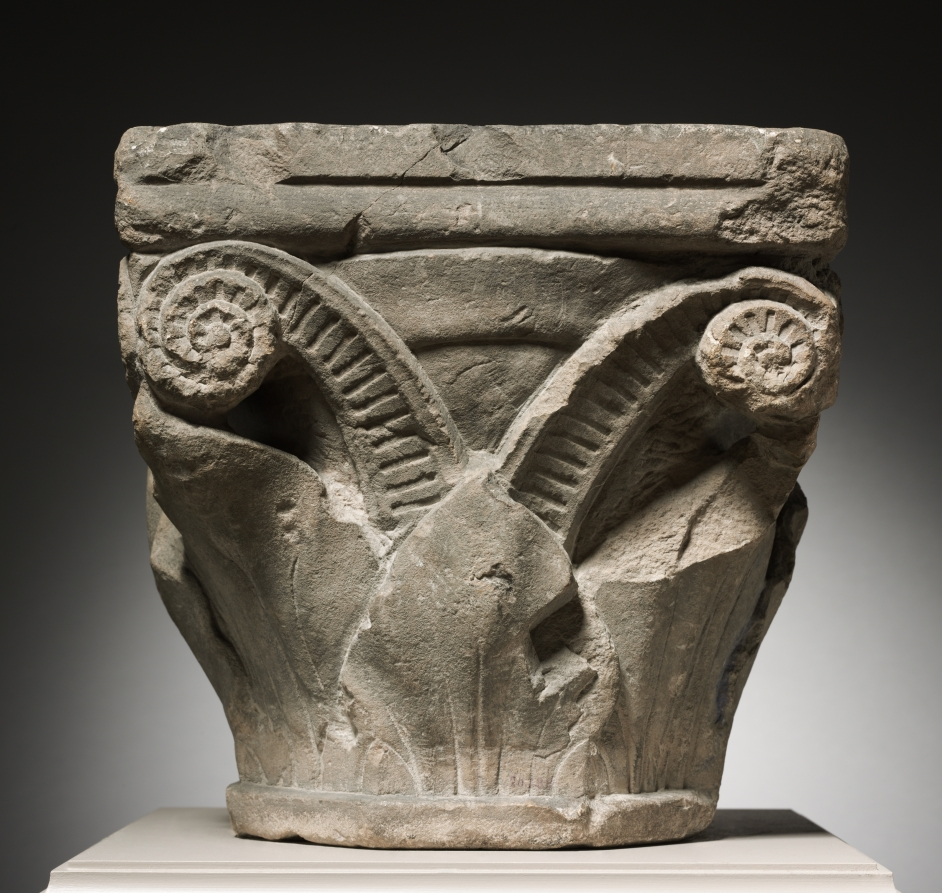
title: Capital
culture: Italy, Migration period, 8th-9th Century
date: 700s-800s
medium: marble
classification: Sculpture